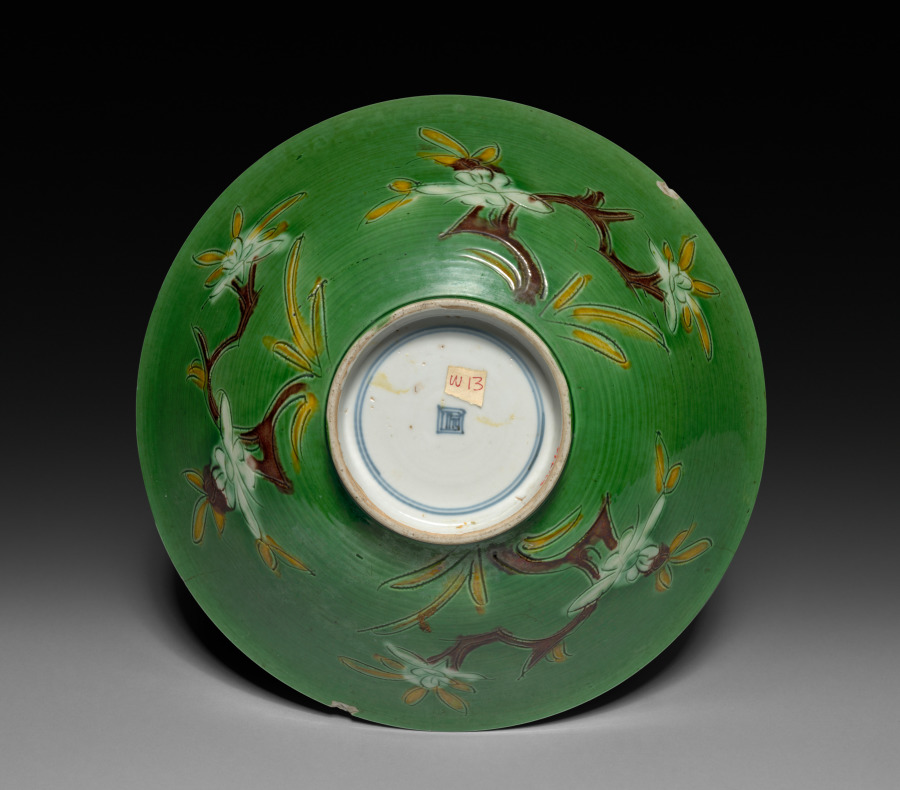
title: Bowl with Sprays of Flowers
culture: China, Jiangxi province, Jingdezhen kilns, Qing dynasty (1644-1911), Kangxi reign (1662-1722)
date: 1662–1722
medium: porcelain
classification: Ceramic